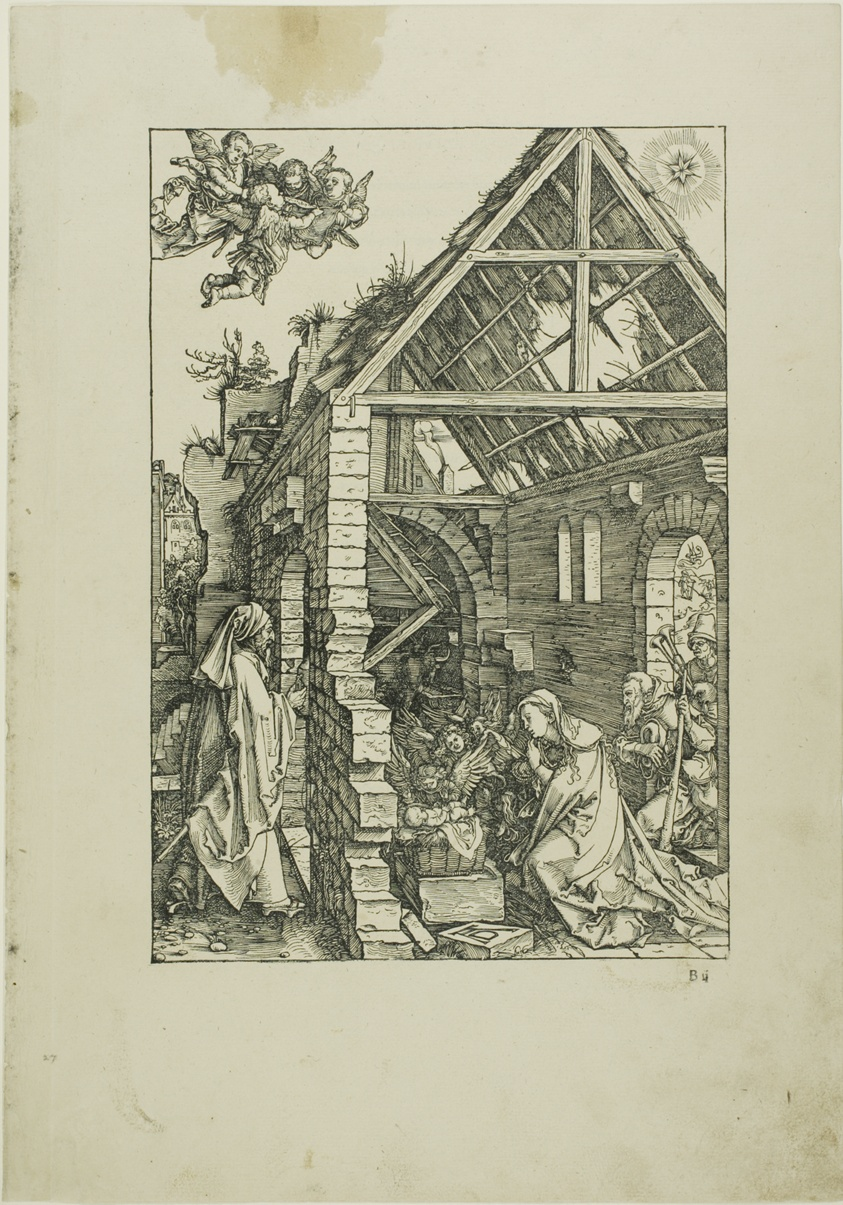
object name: Print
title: The Adoration of the Shepherds, from The Life of the Virgin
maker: Albrecht Dürer (German, 1471-1528)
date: c. 1503, published 1511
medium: Woodcut in black on tan laid paper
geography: Germany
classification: woodcut; print; prints and drawing; paper